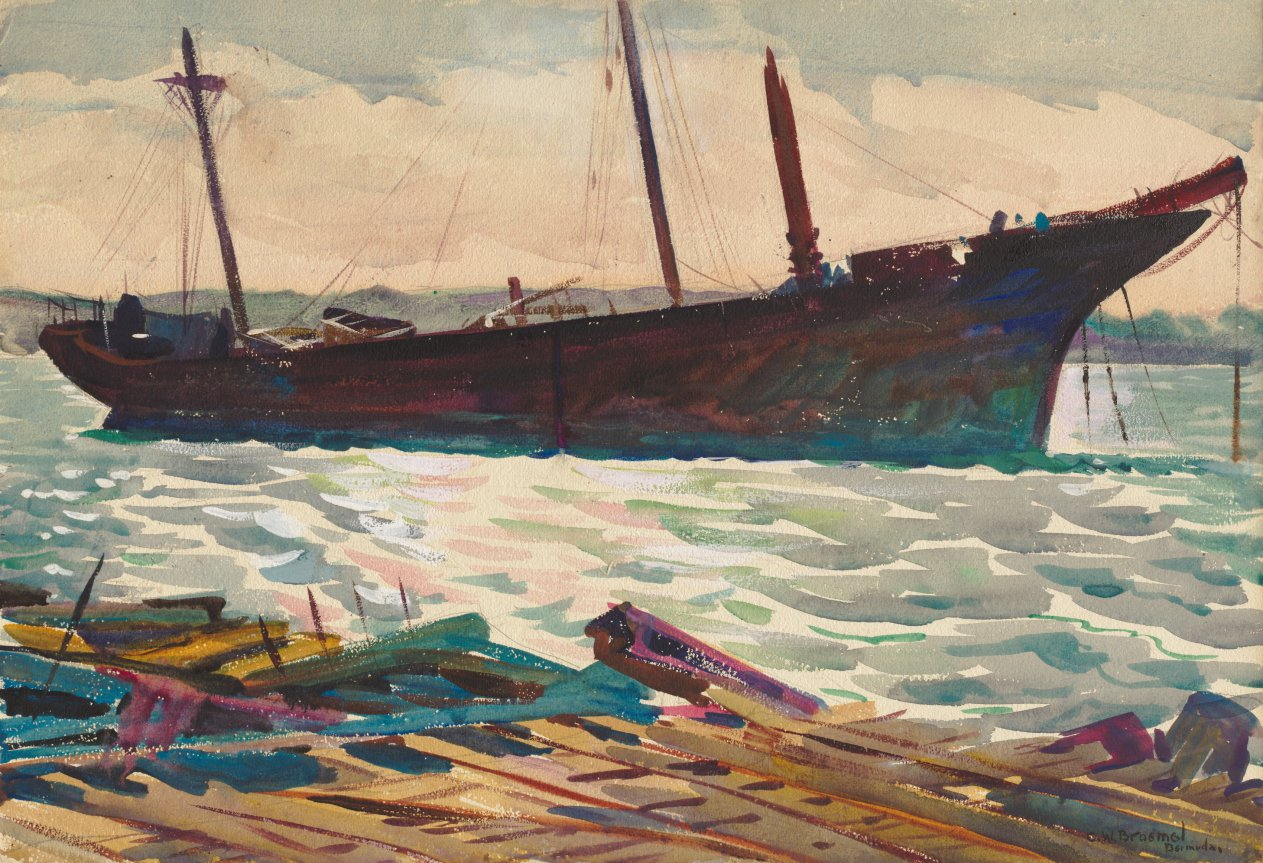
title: Dancing Light of Morning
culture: America, Ohio, Cleveland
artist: Carl William Broemel (American, 1891–1984)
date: c. 1925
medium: watercolor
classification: Drawing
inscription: Signed lower right: "C.W. Broemel/Bermuda"